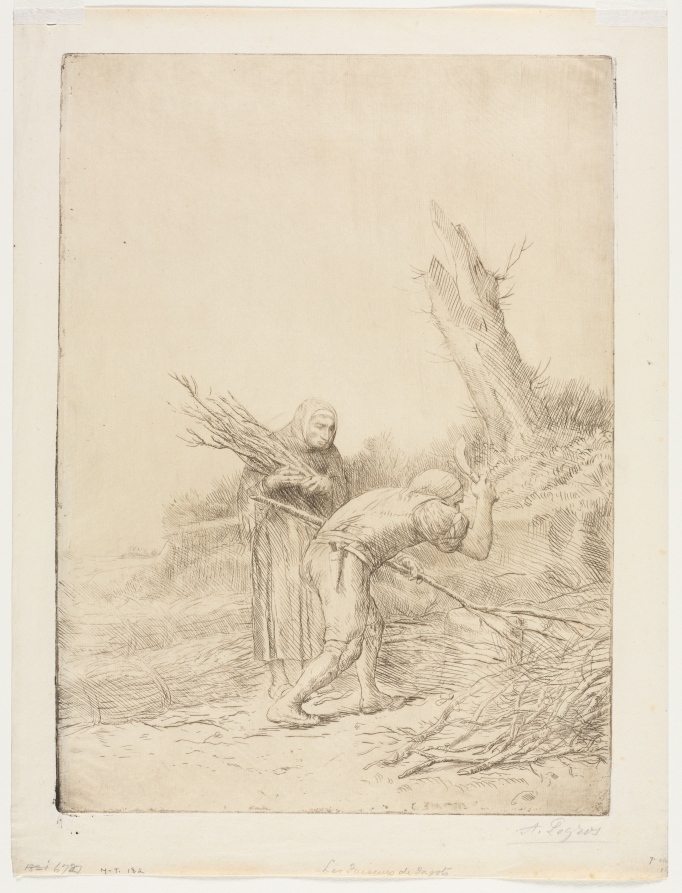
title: Les Faiseurs de fagots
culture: France, 19th century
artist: Alphonse Legros (French, 1837–1911)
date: c. 1857–1911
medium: drypoint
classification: Print